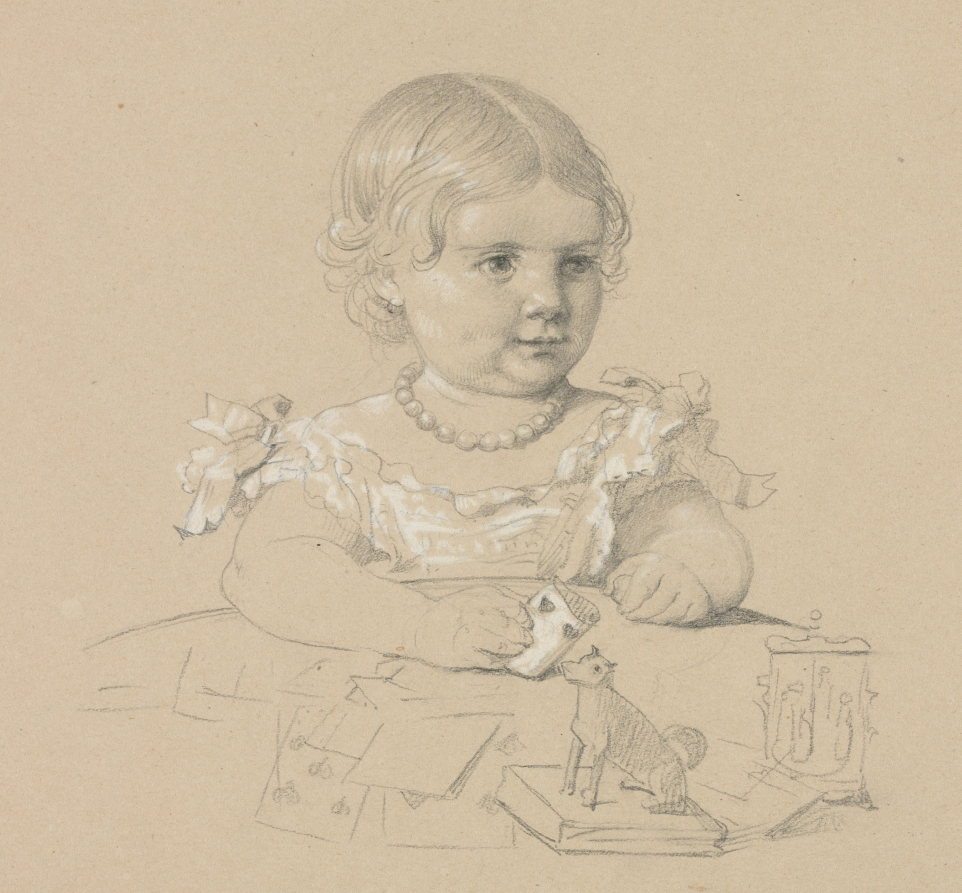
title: Portrait of a Child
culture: France, 19th century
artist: Henri Lehmann (French, 1814–1882)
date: 1800s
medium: graphite with white heightening on tan wove paper pasted down on cream wove paper - a page from an album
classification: Drawing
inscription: Lower right corner of album page, in black ink, Heinrich Inscribed lower center in graphite: "Souvenirs de deux nocturnes (?) 20 May 1858 HL/und wenn es mir auchnicht gelang/so hatt' (?) sie doch ein gross plaisir."